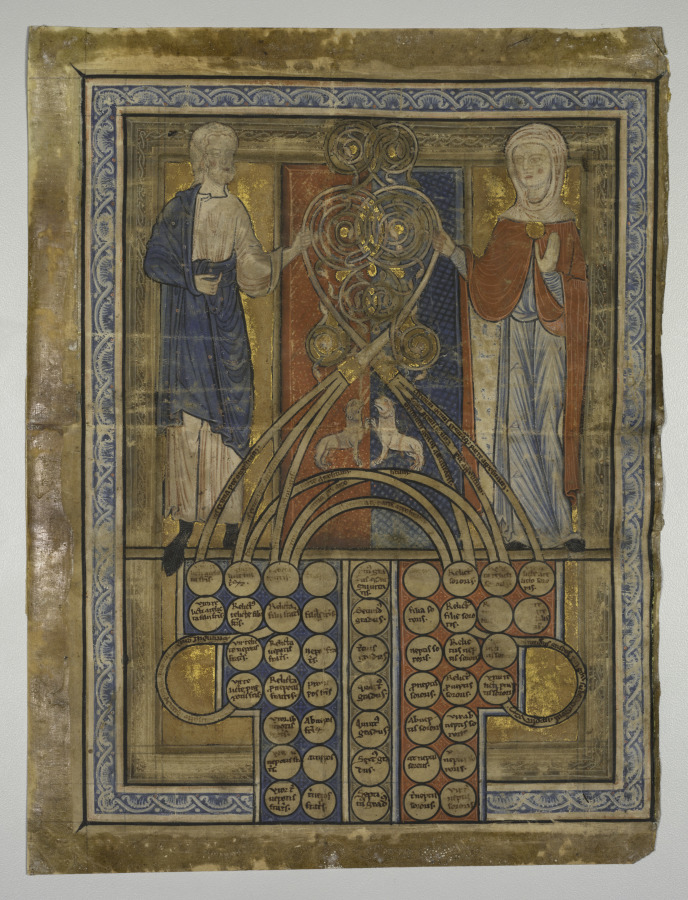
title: Single Leaf: Table of Consanguinity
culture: England, late 12th-early 13th Century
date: c. 1200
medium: ink, tempera, and gold on vellum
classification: Manuscript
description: Consanguinity diagrams were used to show the degree of kinship between an individual and his or her "blood" relations. These tables followed an established tradition dating back to around AD 600. Until church law was relaxed in 1215, a marriage could only be contracted by persons separated by seven degrees of relationship. After 1215 the degree of separation was reduced to four. Tables of Consanguinity were therefore used by church officials to prove or disprove bars to marriage.